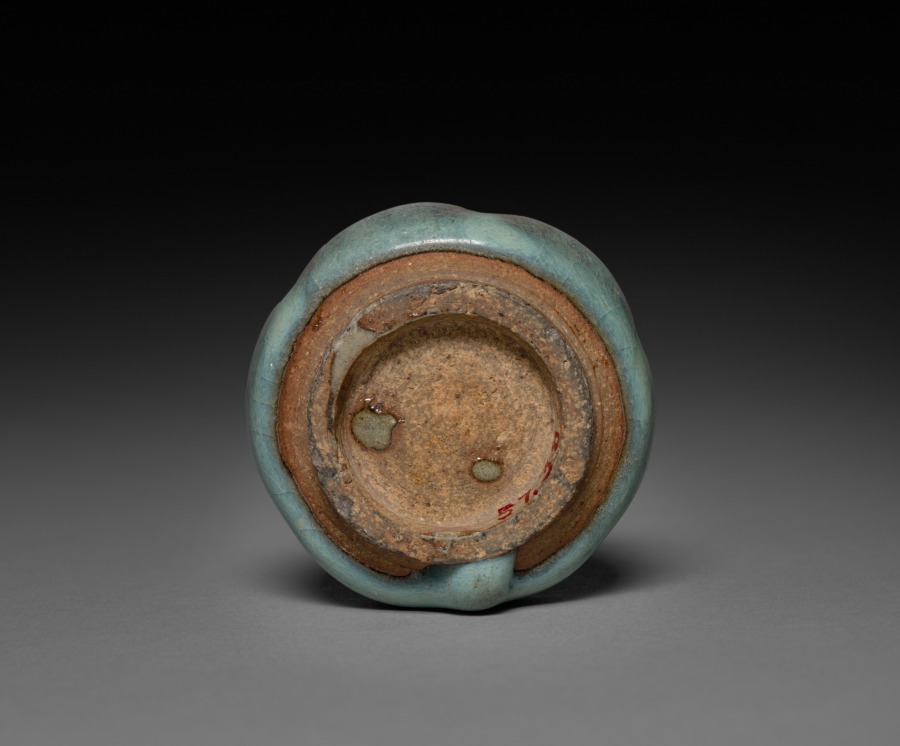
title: Small Lobed Jar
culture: Northern China, Jin dynasty (1115-1234) - Yuan dynasty (1271-1368)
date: 1115–1368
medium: glazed buff stoneware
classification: Ceramic